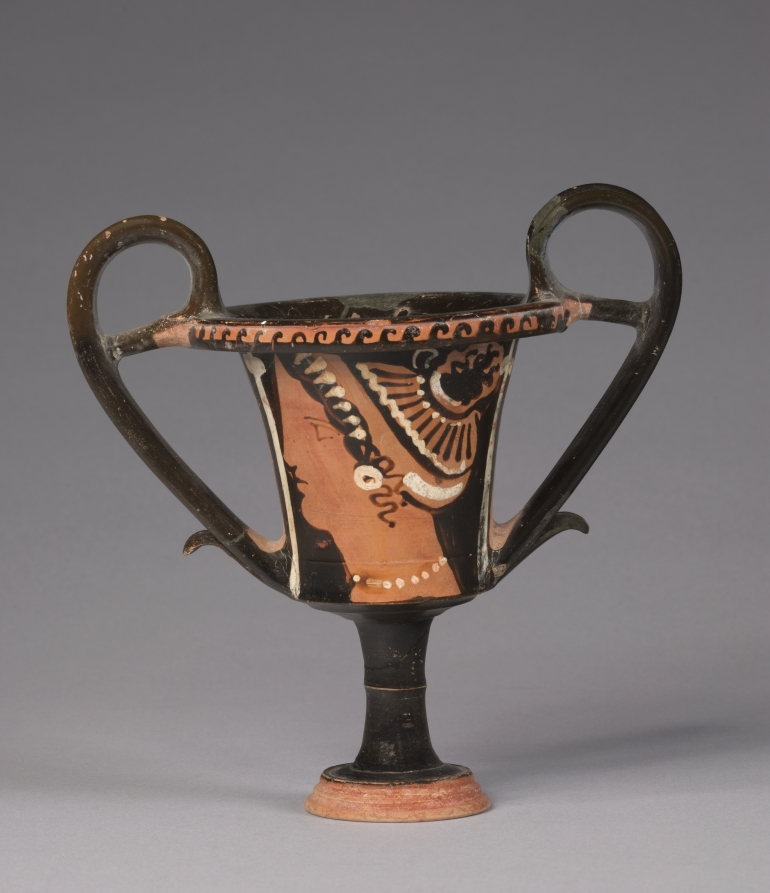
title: Red-Figure Kantharos (Drinking Cup): Female Heads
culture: South Italian, Apulian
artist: attributed to Prague Group (South Italian, Apulian)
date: 330–320 BCE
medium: ceramic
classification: Ceramic